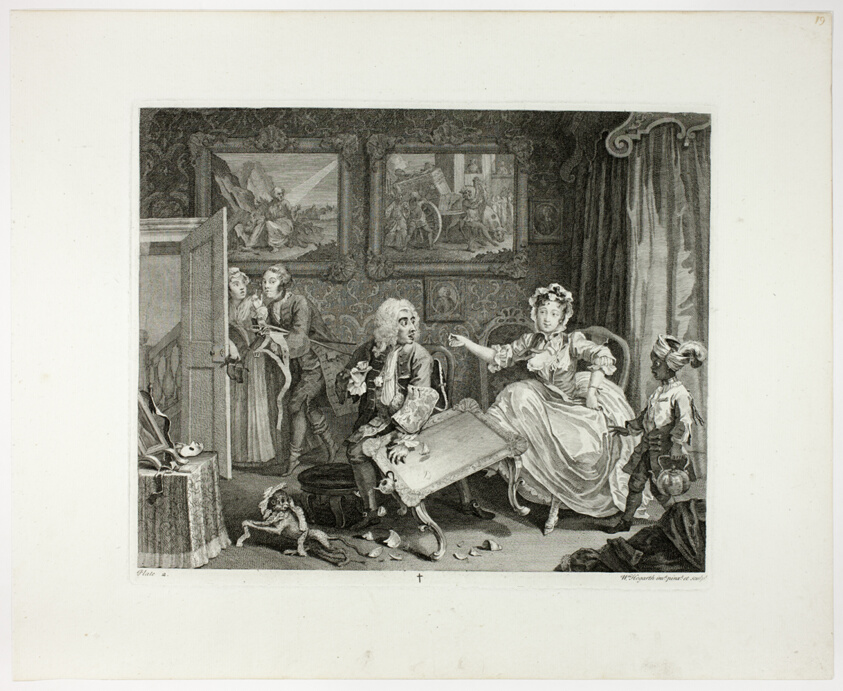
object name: Print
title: Plate two, from A Harlot's Progress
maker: William Hogarth (English, 1697-1764)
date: 1732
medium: Engraving in black on ivory laid paper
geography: England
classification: engraving; paper; print; prints and drawing